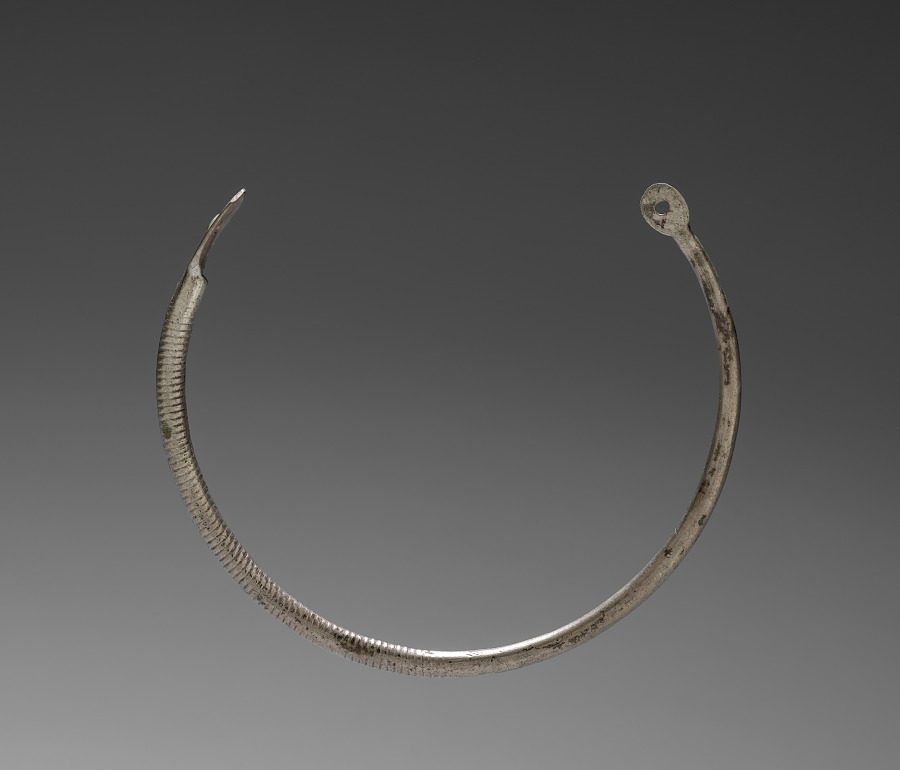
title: Nose Ring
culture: Indo-Chinese, made in France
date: 20th Century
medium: silver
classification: Jewelry